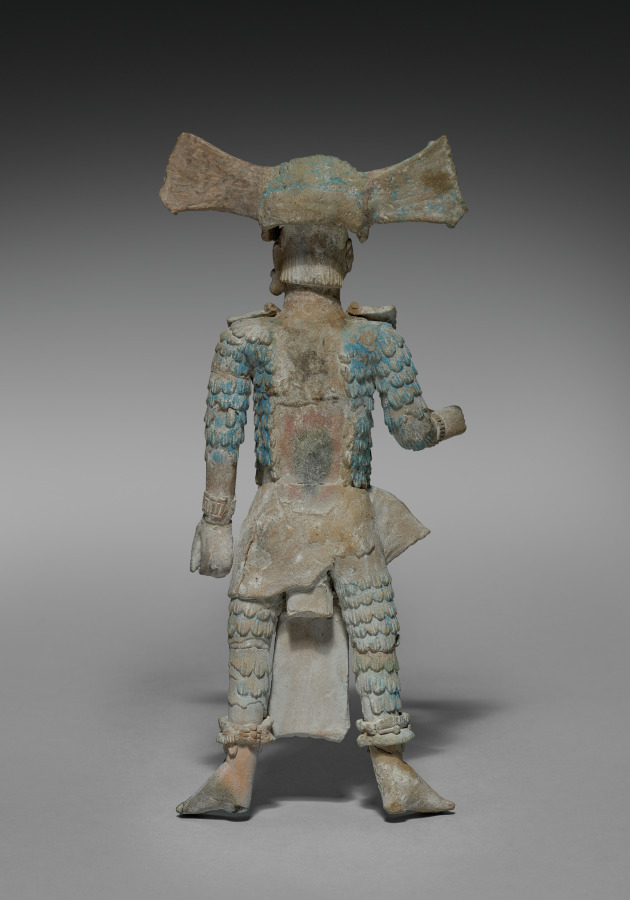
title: Warrior Figurine with Removable Headdress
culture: Mexico, Yucatán, Jaina Island region, Campeche, Maya style (250-900)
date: 600–900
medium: earthenware with pigment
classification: Sculpture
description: The major offerings placed in the Maya graves of Jaina Island were ceramic figurines, some of Mesoamerica's finest, that depict deities and humans in a variety of roles. This warrior, his headdress removable, once probably held weapons and wears either quilted cotton armor or the feathered uniform of a military order. We don't know why such figures are often pot-bellied.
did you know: Maya blue pigment was made by combining clay with indigo in a complex technique developed around the ninth century.